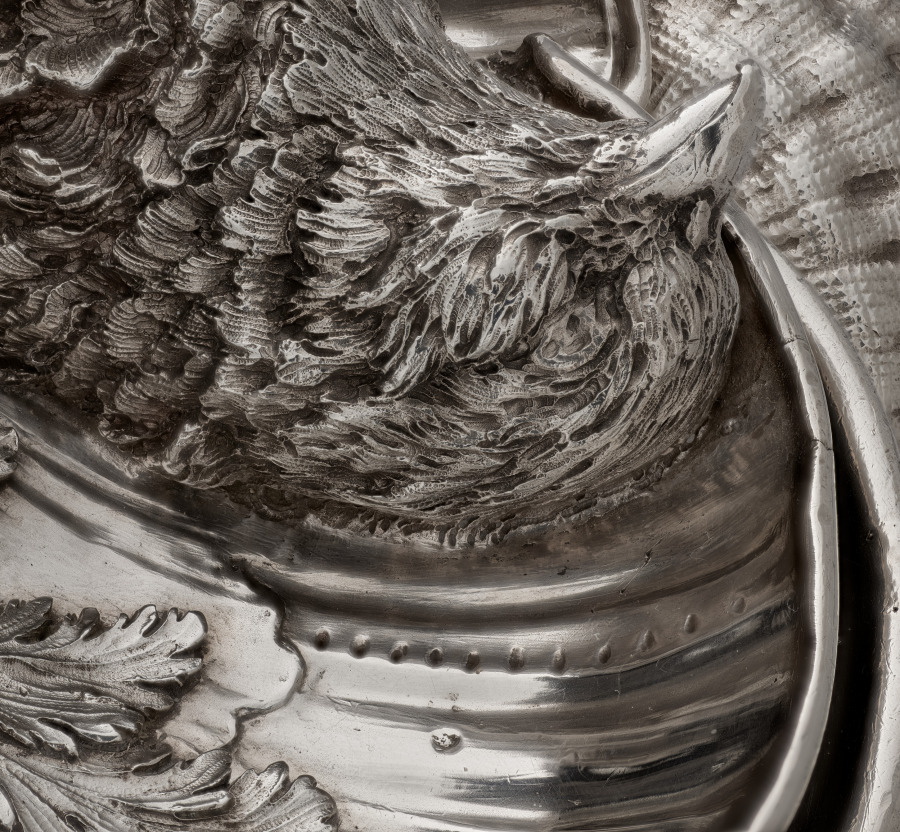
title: Cover for a Tureen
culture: France, Paris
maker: Henry Adnet (French, 1745)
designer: Juste-Aurèle Meissonnier (French, 1695–1750)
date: 1735–38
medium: silver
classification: Silver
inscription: engraved Meissonnier signature.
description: See entry for cover record 1977.182.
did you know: The langoustine, pigeon, and vegetables were cast using real examples giving the silver copies lifelike detail and appearance.